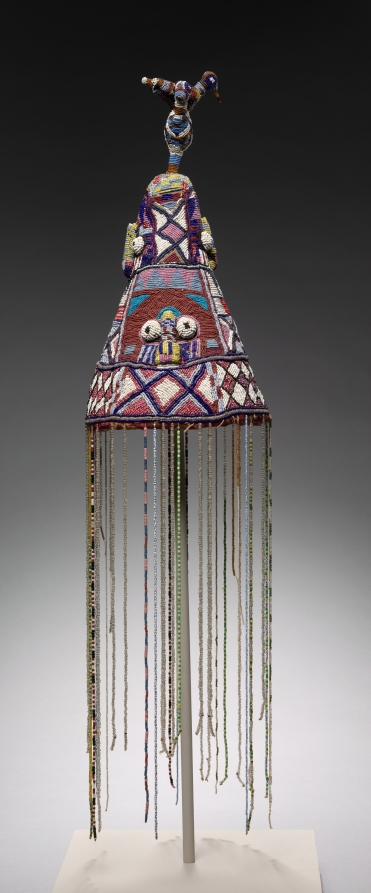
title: Crown (adéńlá)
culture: Africa, West Africa, Nigeria, Yorùbá-style maker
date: 1900s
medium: Cloth (probably cotton and wool), glass beads, reeds, cardboard, wood, plant fiber, cotton, and quills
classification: Garment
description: The most important of all regalia, topped with the "royal bird" Okin, this headdress connects the king to Oduduwa, the mythical founder of the Yoruba. The veil of beaded strings masks the identity of the wearer and protects his subjects from the supernatural powers that radiate from his face. The crown also signifies the "inner head" of the king, the locus of an awesome life force called ase.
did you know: No one––not even the king who wears it––is allowed to look inside this crown, as that's where it is most powerful.